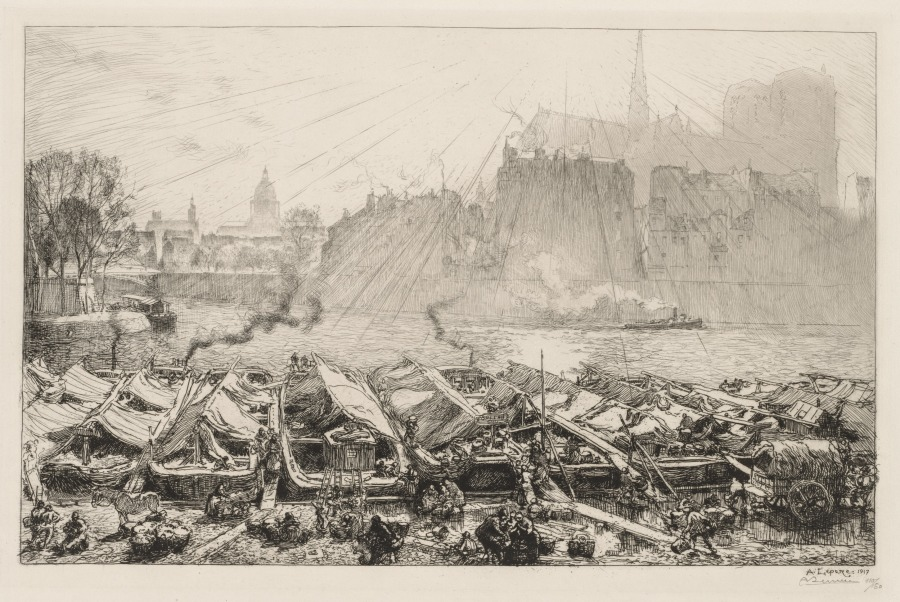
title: Le Grande Marché aux Pommes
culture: France, 20th century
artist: Auguste Louis Lepère (French, 1849–1918)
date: 1917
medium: etching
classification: Print